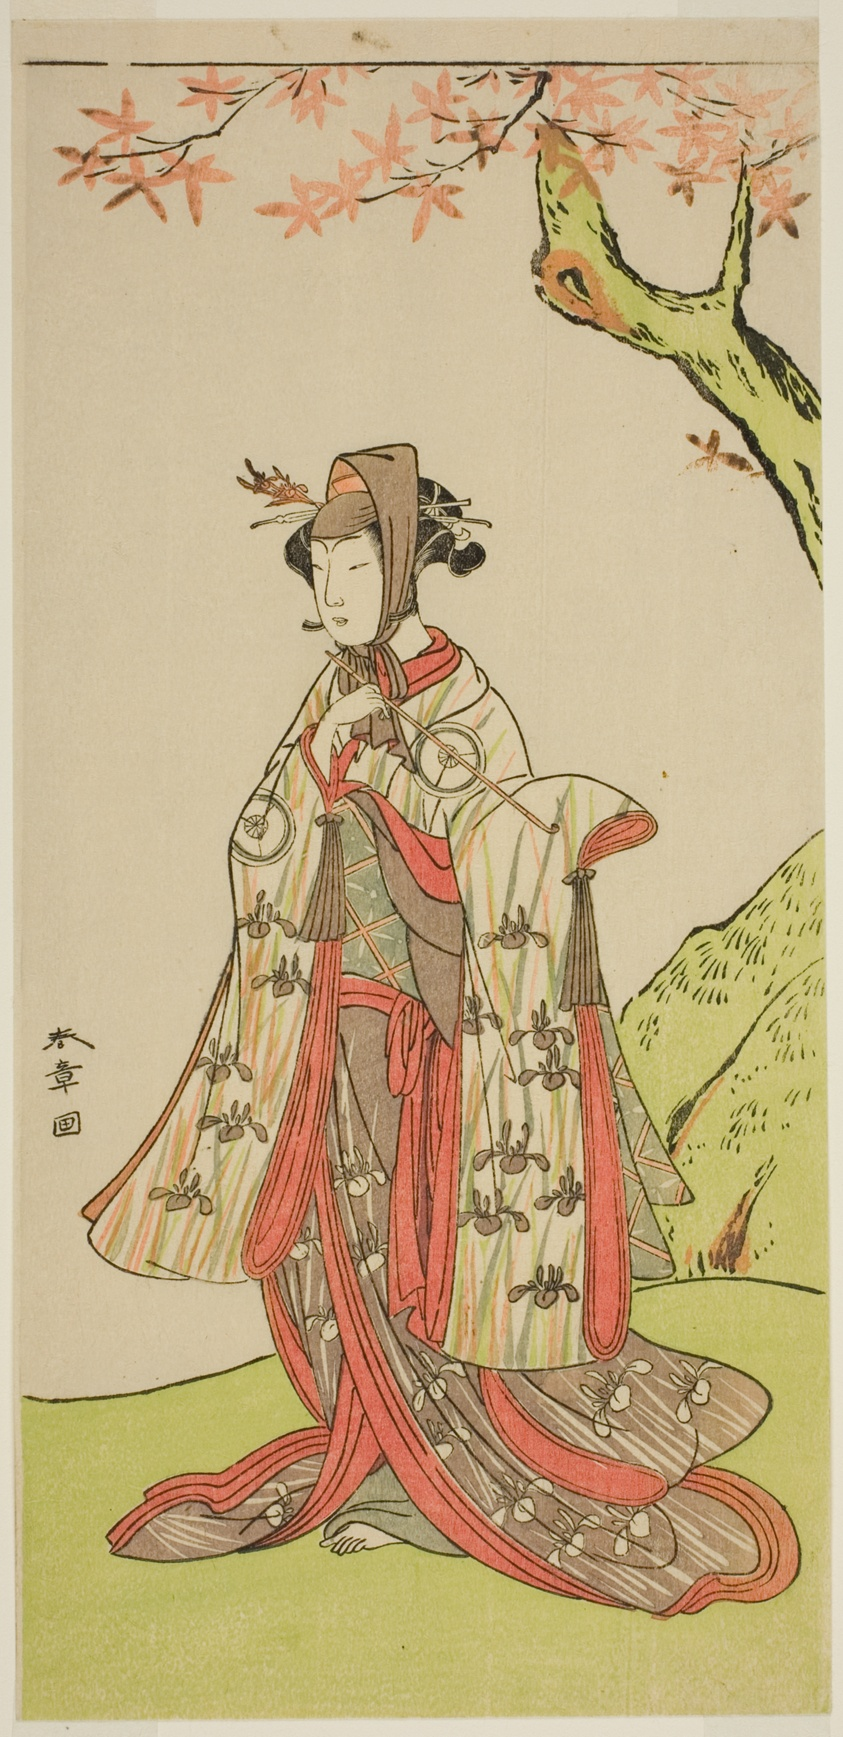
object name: Print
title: The Actor Iwai Hanshiro IV as Princess Sakura (Sakura Hime) in the Play Wada Sakamori Eiga Kagami, Performed at the Nakamura Theater in the Third Month, 1773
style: Japanese (culture or style)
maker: Katsukawa Shunsho 勝川 春章; Japanese, 1726-1792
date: c. 1773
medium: Color woodblock print; hosoban; right sheet of diptych (?)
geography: Japan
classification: woodblock print; print; asian art